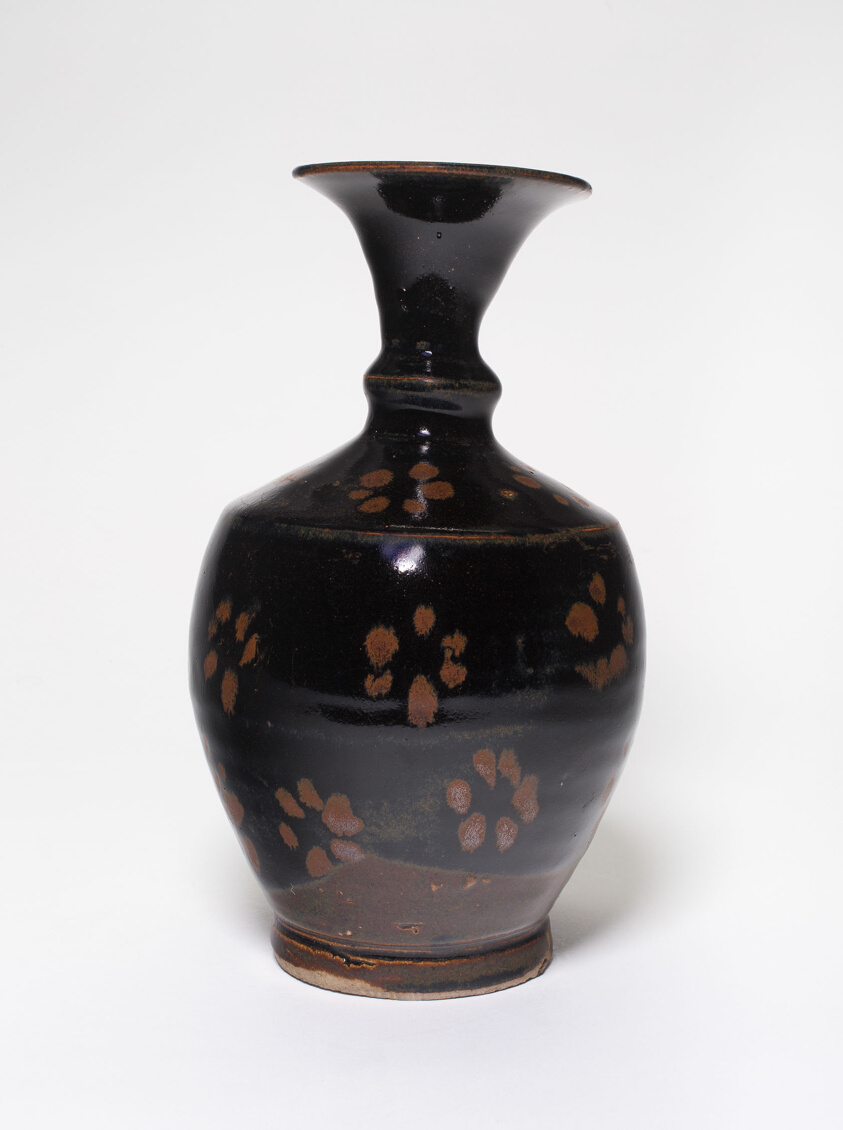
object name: Vessel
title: Vase with Stylized Petals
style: Chinese (culture or style)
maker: China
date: Jin dynasty (1115–1234), or Yuan dynasty (1271–1368), 12th/14th century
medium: Stoneware with black and brown glazes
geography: China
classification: vase; vessel; stoneware; asian art; ceramics